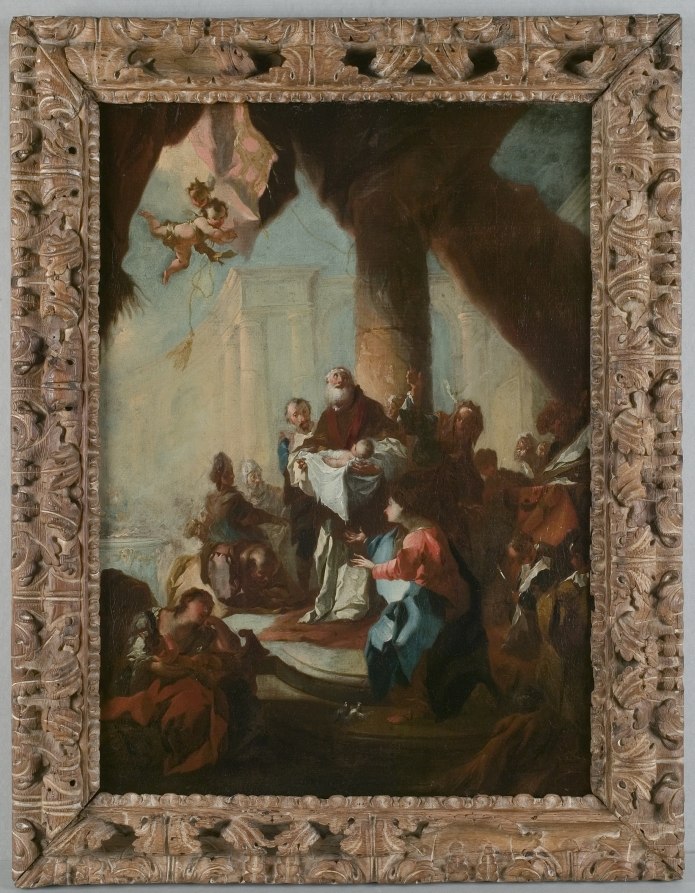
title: Study for "The Presentation of Christ in the Temple" (for Saint Ulrich, Vienna)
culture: Austria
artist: attributed to Franz Anton Maulbertsch (Austrian, 1724–1796)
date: c. 1750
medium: oil on canvas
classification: Painting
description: This loosely painted sketch is the preliminary design for an altarpiece in the Church of Saint Ulrich, Vienna. Mary and Joseph have brought the infant Jesus to the temple to be inducted into the Jewish faith; the aged priest Simeon cradles the infant in his arms, turning his gaze to heaven as he realizes that he is holding the Son of God. Strong contrasts of light and shadow underscore the drama of the moment. The frame is not original to this painting, but was made by an Austrian craftsman in the mid-1700s. Its florid style suits Maulbertsch’s flickering brushwork, and reflects the tradition of wood sculpture from Central Europe seen in other objects in the CMA's collection.